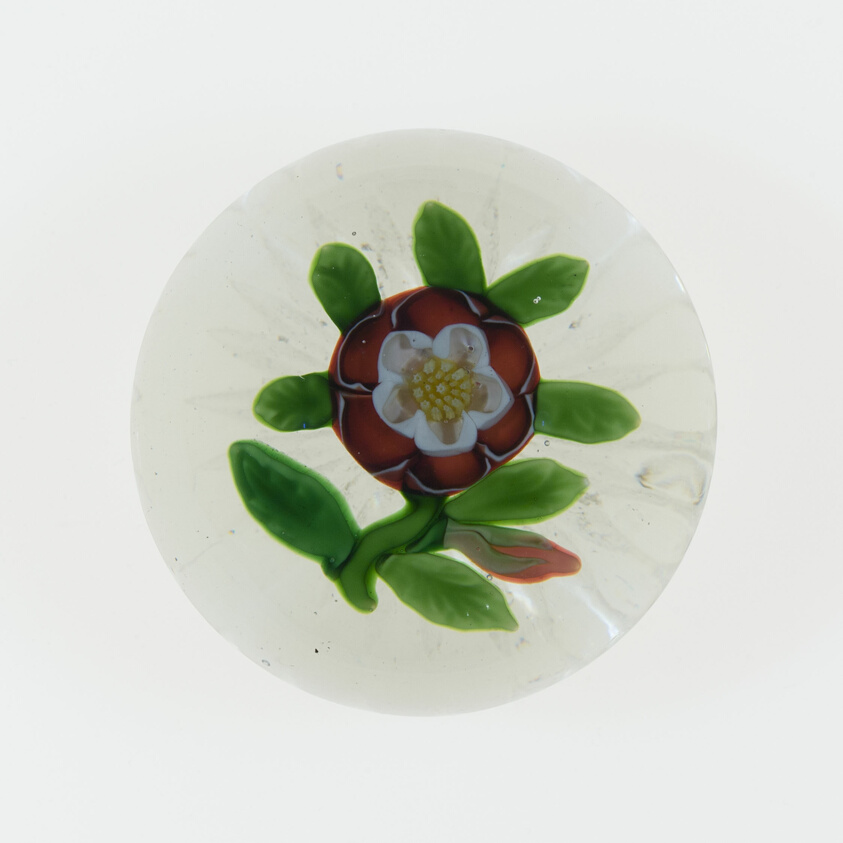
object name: Glass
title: Paperweight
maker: Baccarat Glassworks (Cristalleries de Baccarat); Lorraine, France, founded 1764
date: c. 1845–60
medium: Glass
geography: Baccarat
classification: paperweight; glass